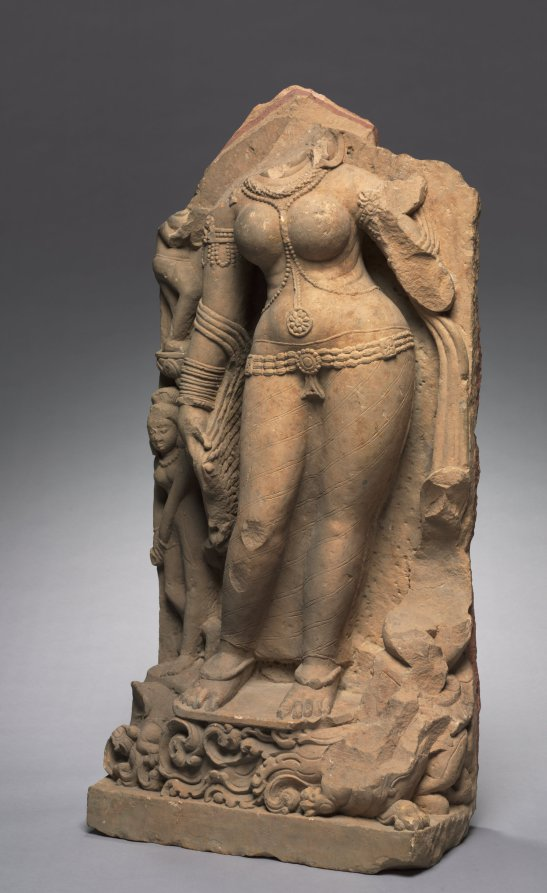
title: River Goddess Ganga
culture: Northern India, Uttar Pradesh, Mathura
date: c. 700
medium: sandstone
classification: Sculpture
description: The Ganges River that runs from the Himalaya Mountains east to the Bay of Bengal is India's most sacred river. Hindu myths tell of how the god Shiva held out a lock of his hair to catch the fall of the heavenly river, identified with the Milky Way, so that it would trickle gently to earth. The river is personified as the goddess Ganga, and since she flows eternally through the hair of Shiva, the river is considered holy. Sculptures of Ganga were placed at the doorway of temples, for the image of the purifying waters symbolically cleanses those who enter the sacred space. She stands on a crocodile-like creature called makara, here shown with a fancifully foliated tail.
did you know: The vein of red sandstone visible in the broken top locates the source as a quarry near Mathura.